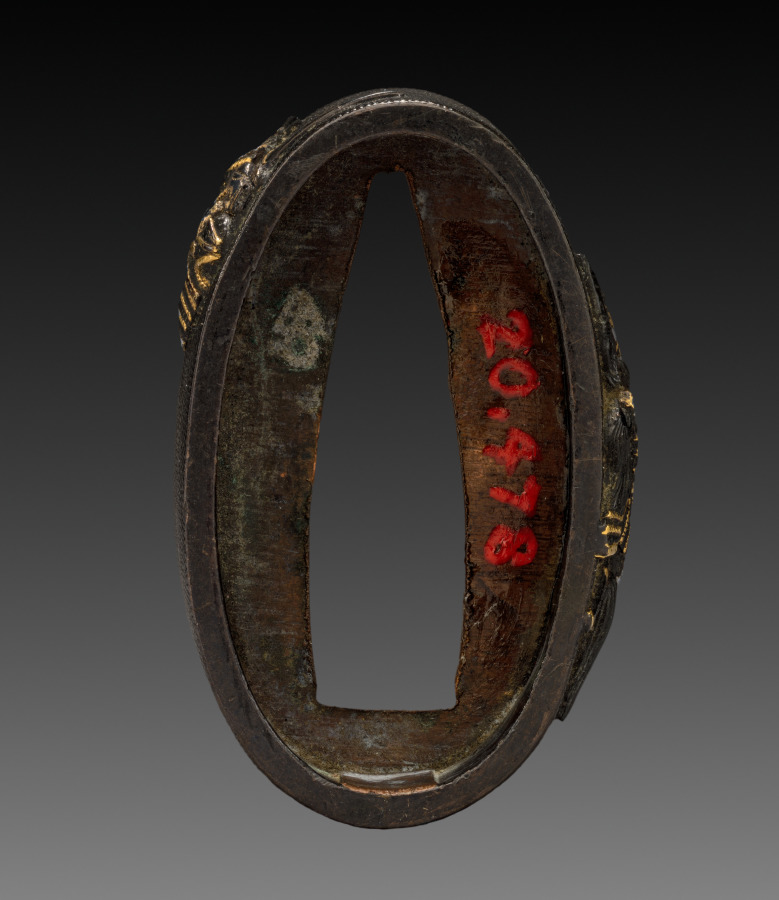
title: Sword-Hilt Collar (Fuchi)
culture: Japan, Edo period (1615–1868)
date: 1700–1850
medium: shakudo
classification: Arms and Armor